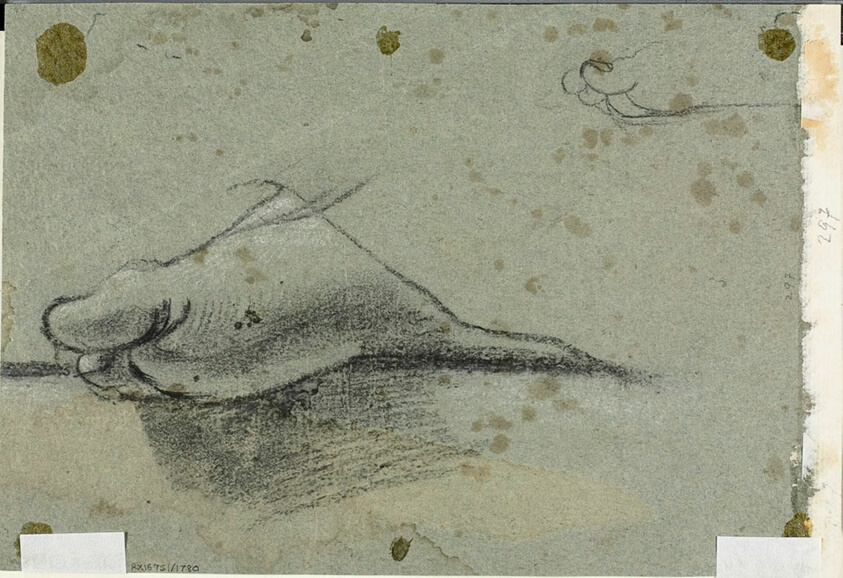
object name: Drawing and Watercolor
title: Crossed Hands (recto); Right Foot, Partially Covered by Drapery (verso)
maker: Jacopo Cavedone; Italian, 1577-1660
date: 1625/29 (recto); c. 1620 (verso)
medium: Charcoal, heightened with white chalk (recto and verso), on blue laid paper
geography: Italy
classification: chalk; drawings (visual works); prints and drawing